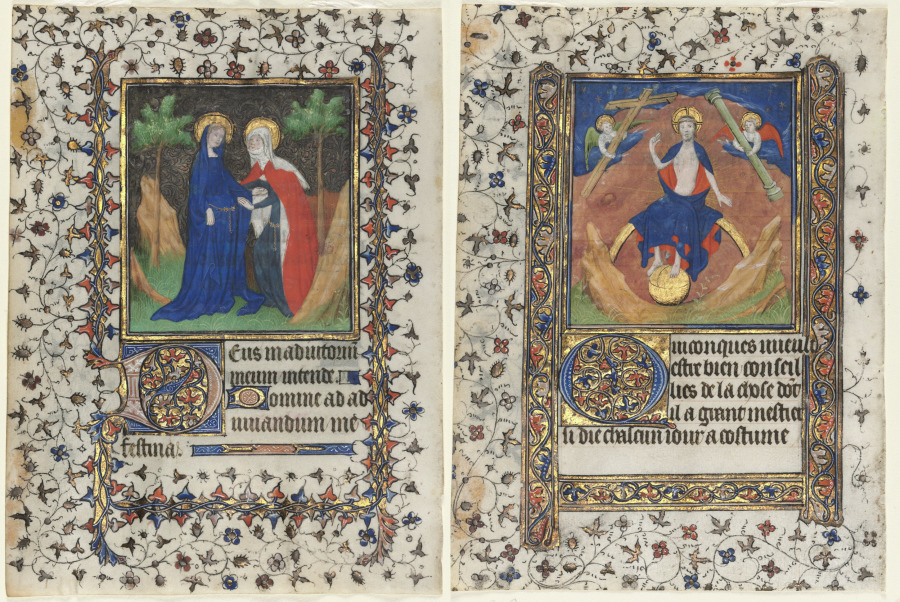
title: Leaves from a Book of Hours: The Visitation and Christ in Judgment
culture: France, Paris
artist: workshop of Boucicaut Master (French, Paris, active about 1410–25)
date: c. 1415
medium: ink, tempera, and gold on vellum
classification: Manuscript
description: The heart of every book of hours is the Hours of the Virgin. With this set of prayers, the reader asked the Virgin Mary to intercede on their behalf. The prayers come mostly from the Bible and include psalms, hymns, and readings. The Hours of the Virgin emerged from the eight “hours” of the day in the monastic world’s routine of daily prayers from daybreak to late at night. Originally used solely by the ordained, by the 1000s, these prayers had spread to the general population through their inclusion in books of hours. This section is traditionally illustrated by images from the life of the Virgin Mary, with each hour featuring a different event. The scene of the Visitation opens lauds, the prayers said at night or upon rising.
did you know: Highly customizable, the order of a book of hours shifts, and individual prayers vary, sometimes significantly, from region to region.